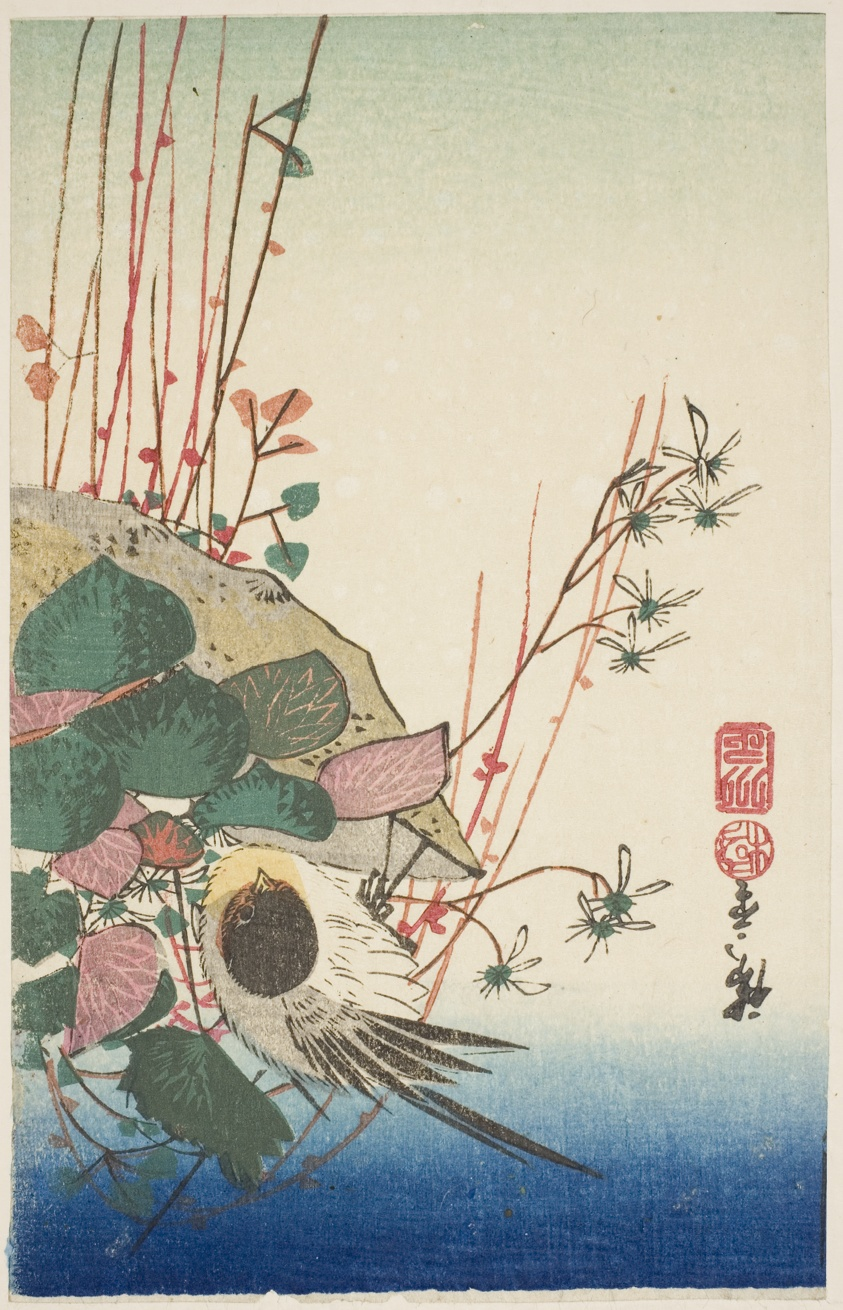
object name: Print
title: Sparrow on a hanging planter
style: Japanese (culture or style)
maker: Utagawa Hiroshige 歌川 広重; Japanese, 1797-1858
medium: Color woodblock print; yotsugiriban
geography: Japan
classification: woodblock print; print; asian art